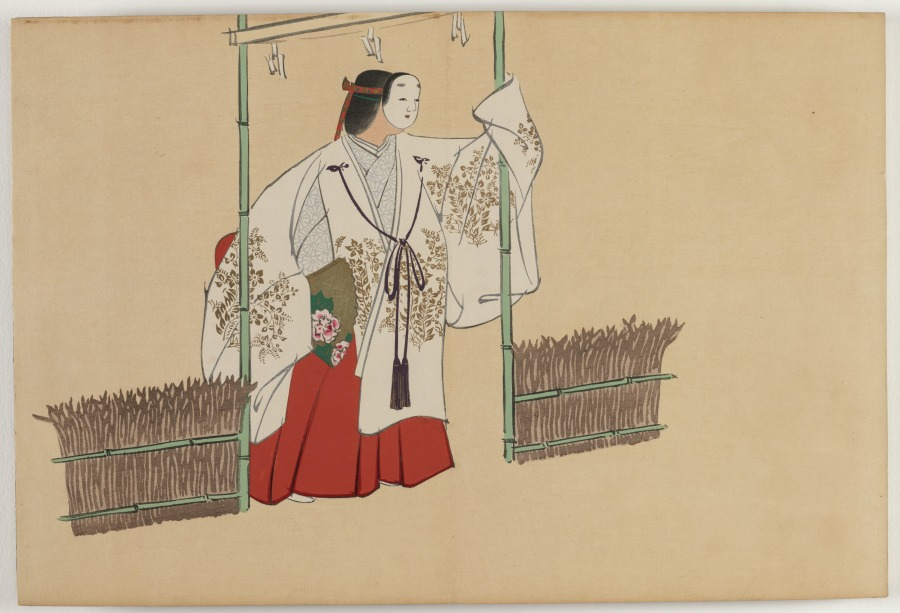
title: Flowers of a Hundred Worlds (Momoyogusa): Nonomiya (Nonomiya)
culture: Japan, Meiji period (1868–1912)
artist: Kamisaka Sekka (Japanese, 1866–1942)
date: 1909–10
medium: color woodcuts with gold and silver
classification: Bound Volume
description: This print from a set of three woodblock printed albums displays the graphic design prowess of Kamisaka Sekka. The images were first distributed one by one to subscribers to the series but later were reissued in bound form, like this book, for mass consumers. Each print features a vignette taken from nature or Japanese literature. Many of the scenes have a long history in Japan, originating in the 900s or 1000s and having been interpreted by all manner of artists since that time. Sekka’s selections hew closely to precedents from the Rinpa style originated by painter Tawaraya Sōtatsu (c. 1570–c. 1640) and calligrapher Hon’ami Kōetsu (1558–1637).